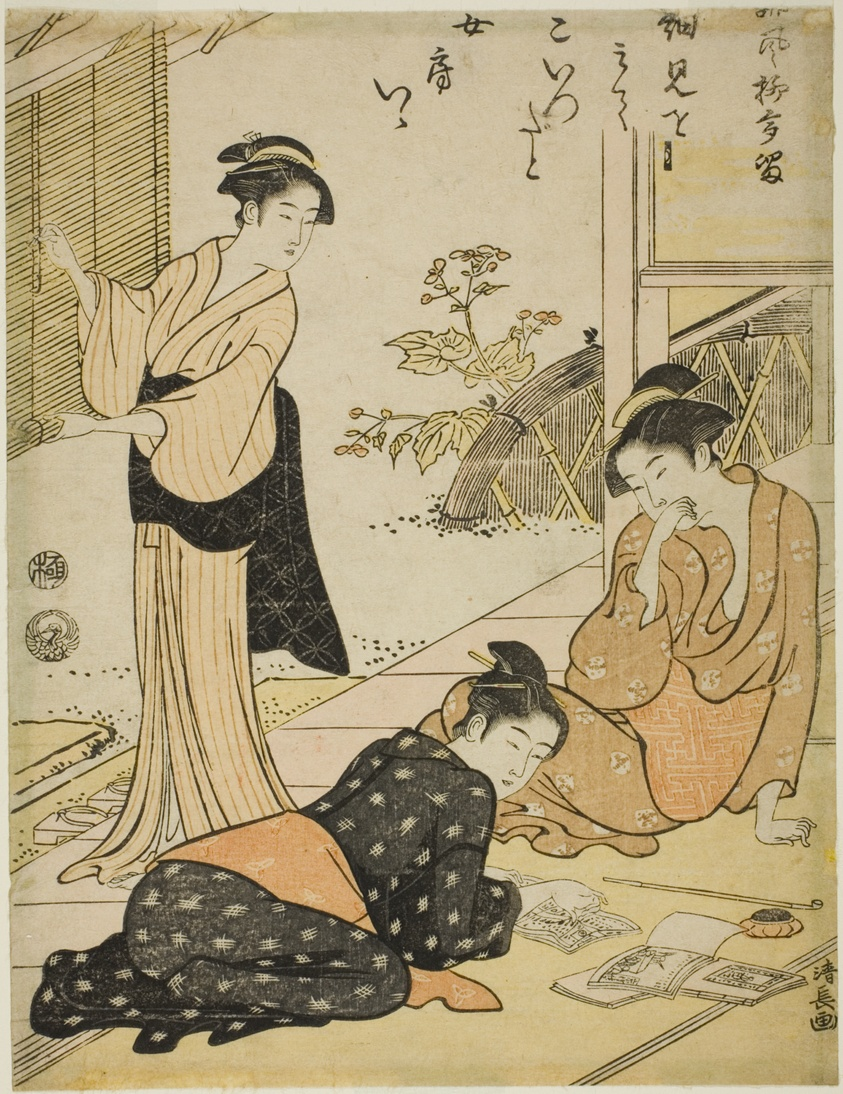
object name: Print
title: Discovering the Address of a Husband's Lover, from the series "A Collection of Humorous Poems (Haifu yanagidaru)"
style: Japanese (culture or style)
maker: Torii Kiyonaga (Japanese, 1752-1815)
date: c. 1790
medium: Color woodblock print; chuban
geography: Japan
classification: woodblock print; print; asian art